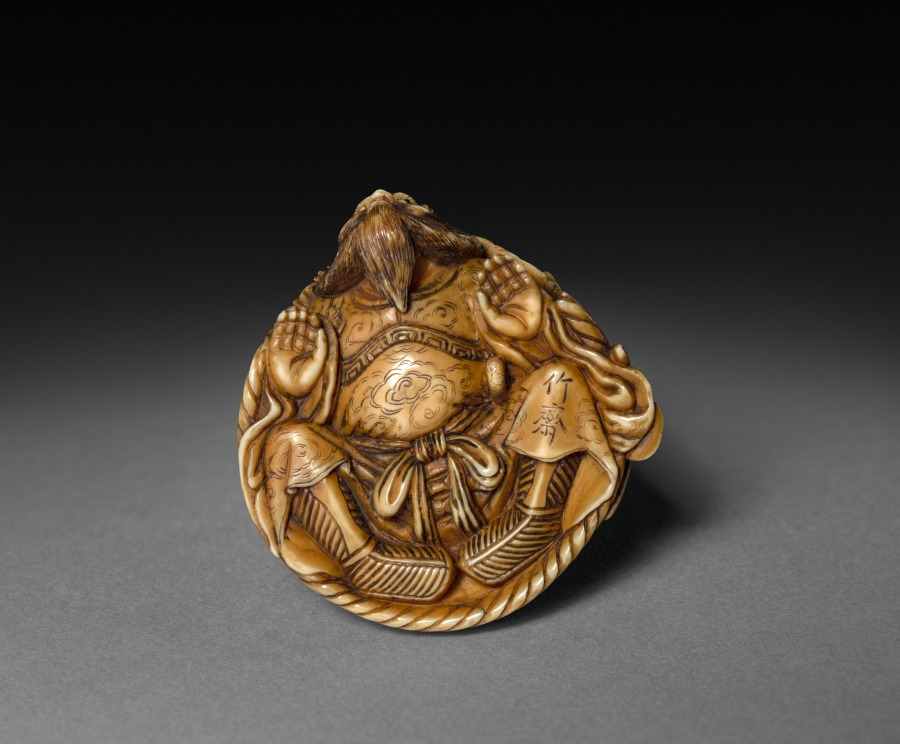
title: Demon Covering Shoki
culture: Japan, Edo period (1615–1868)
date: early to mid-1800s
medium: ivory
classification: Netsuke